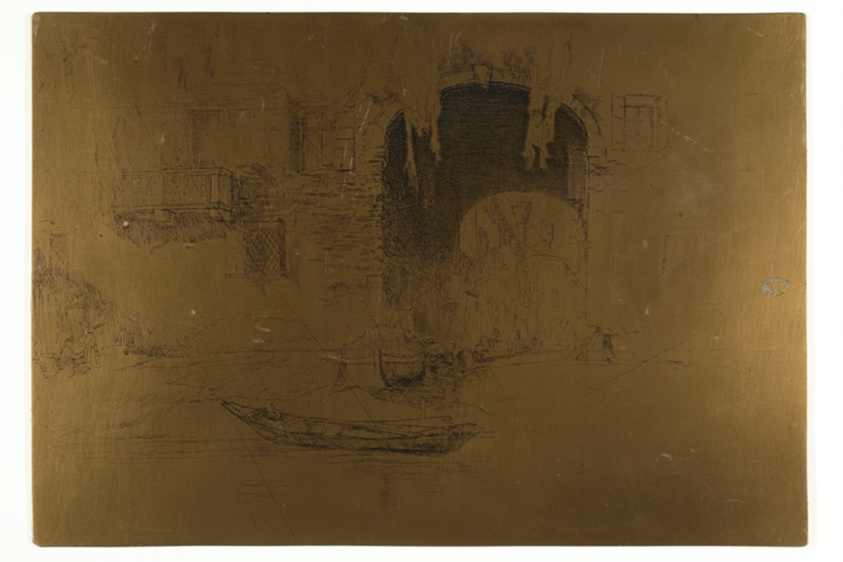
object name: Print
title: San Biagio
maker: James McNeill Whistler (American, 1834-1903)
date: 1880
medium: Cancelled copper plate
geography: United States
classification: copper plate; prints and drawing; matrix; print